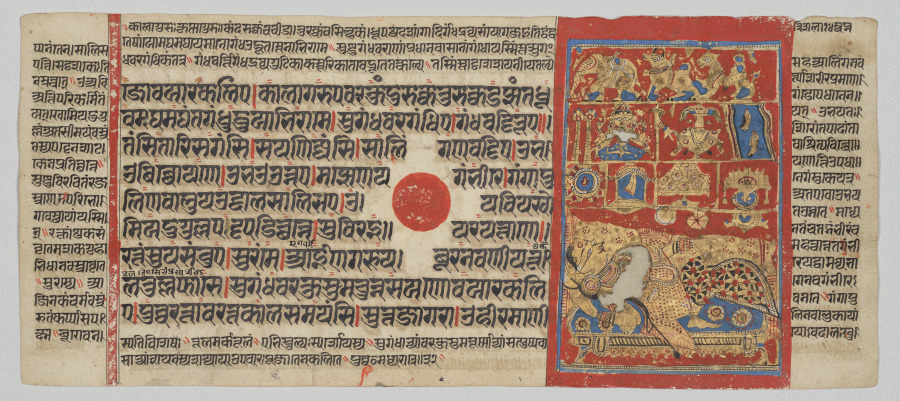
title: The Fourteen Dreams of Queen Trishala, folio 14 (recto), from a Kalpa-sutra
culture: Western India, Gujarat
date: c. 1475–1500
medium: Gum tempera, ink, and gold on paper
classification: Painting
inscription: [[upper right]] triśalā 14 svapna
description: Accounts of the lives of liberated beings of the Jain religion are illuminated with special emphasis on the miraculous circumstances leading to the birth of its historical founder Mahavira (500s BCE). For Jains, liberated beings are not reborn after they die; they exist eternally in a blissful meditative state. After a divinity miraculously implanted the embryo of Mahavira into the womb of Queen Trishala, she dreamed of 14 good omens. Later in the manuscript is an intimate moment between the mother and her special newborn. The bold and costly palette lends the paintings an otherworldly quality.